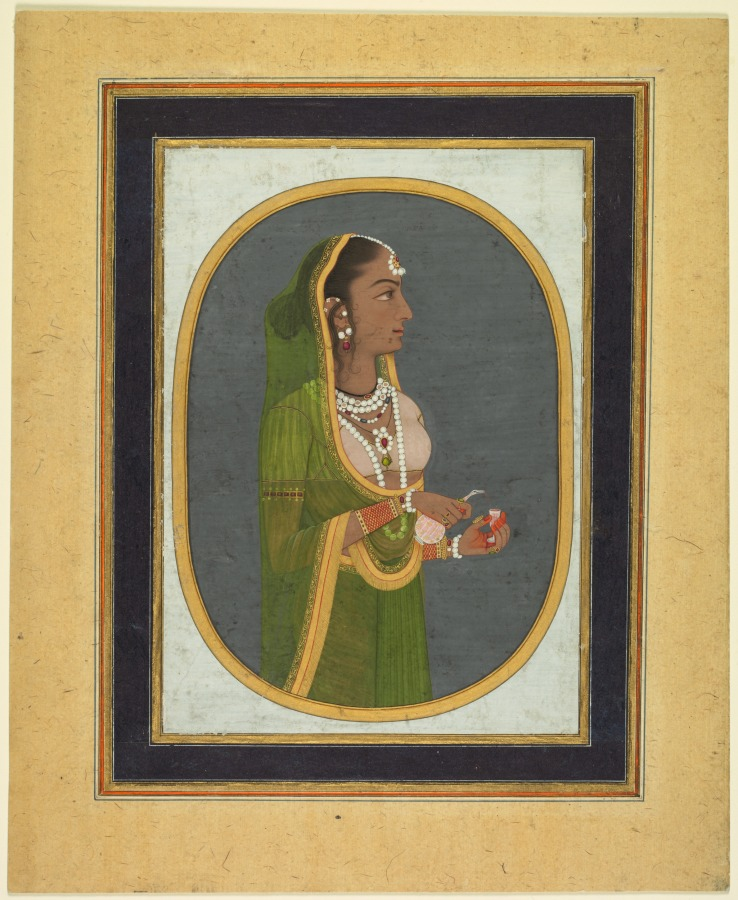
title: Court Lady Pouring Wine (recto)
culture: Mughal India, probably Lucknow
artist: attributed to Muhammad Rizavi Hindi (Indian, active mid-1700s)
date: c. 1760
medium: Gum tempera and gold on paper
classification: Painting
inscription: verso: Illuminated panel of Persian poetry in nast'aliq calligraphy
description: The artist has depicted a glass or crystal duck-headed decanter adorned with a gilded grapevine motif, signaling the contents. The red wine flows from the duck’s mouth into a tiny cup. Such bird-shaped wine vessels are vestiges of the blood sacrifices once part of ancient Persian court rituals. On the verso, floral sprigs illuminate the central calligraphic work, and paired verses have been written in smaller script all around the border. On this page, all the verses are about the beauty of—and longing for—the beloved.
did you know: The bird-headed decanter evokes blood rites of kingship in pre-Islamic Iran.